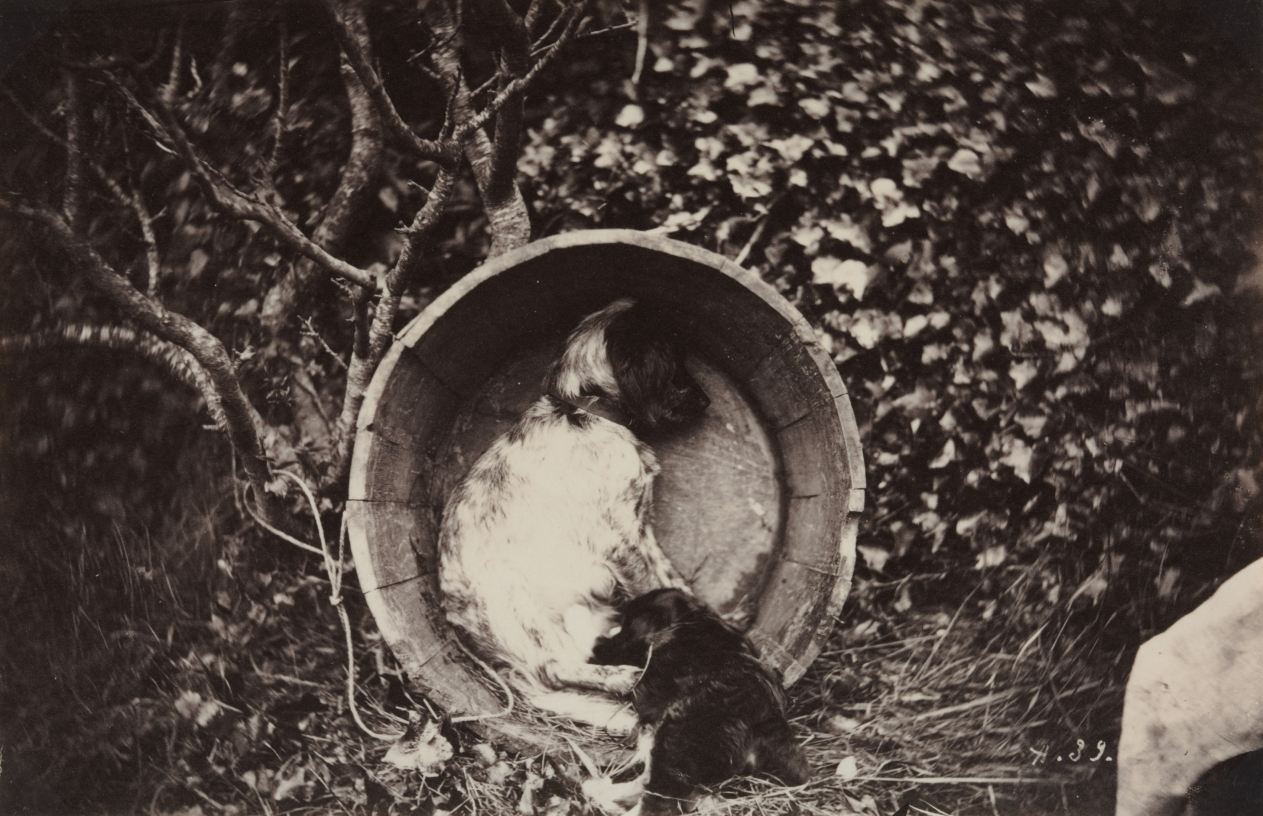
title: Dog and Puppy in Barrel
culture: France, 19th century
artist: Auguste Giraudon's Artist (French)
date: late 1870's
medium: albumen print from wet collodion negative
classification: Photograph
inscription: printed in lower right corner of recto (on negative): "H.39"